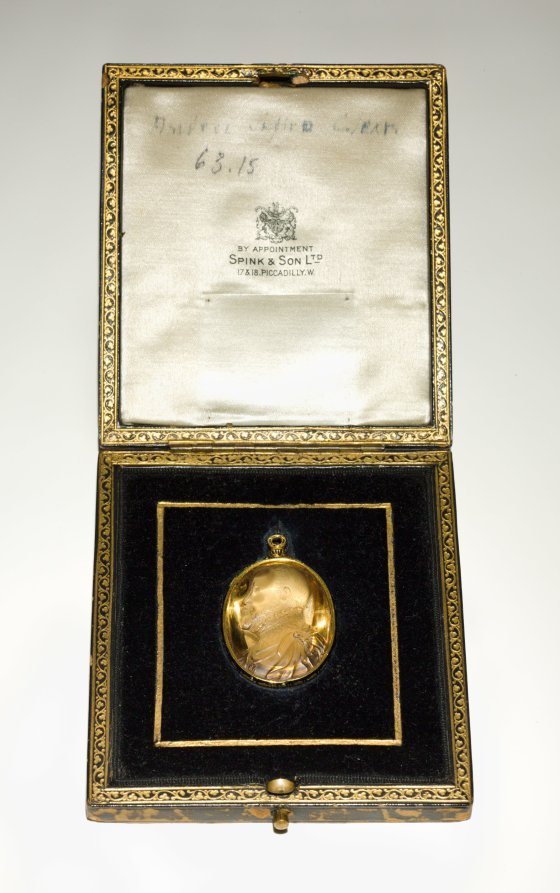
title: Portrait of Philip II, King of Spain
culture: Italy, 16th century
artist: Alessandro Cesati (Italian, before 1538-after 1564)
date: mid-1550s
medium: citrine, mounted in a gold and enamel pendant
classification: Sculpture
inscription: Signed on collar .A.E. (Likely abbreviation for “ΑΛΕΞΑΝΔΡΟΣ ΕΠΟΙΕΙ”, or “Alexandros Epoiei,” which translates to “Alexander made [me / this].”)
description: Clad in armor, Philip II wears a chain with the Order of Golden Fleece around his neck. The remarkably precise and varied cutting describes the textures of cloth, metal, skin, and hair while presenting the king’s features with striking naturalism—complete with receding hairline and prominent chin—as well as conveying his forceful character. Carved gems were luxury arts of the highest order in the Renaissance, hotly collected and used as diplomatic gifts. The original patron is not yet known, but cameos played a prominent role at the Spanish court, where the royal family often hold gems of Philip II in their portraits. The yellow quartz, rare in the 1500s, probably came from a newly opened source in South America; this object is thus both a natural marvel and a masterful portrait. One of only three known works signed by the artist (his initials appear at miniscule scale on the collar just below the knot of cloth), this stone is also likely in its original setting.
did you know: The ancient Romans believed citrine, a type of quartz, offered protection against evil thoughts.